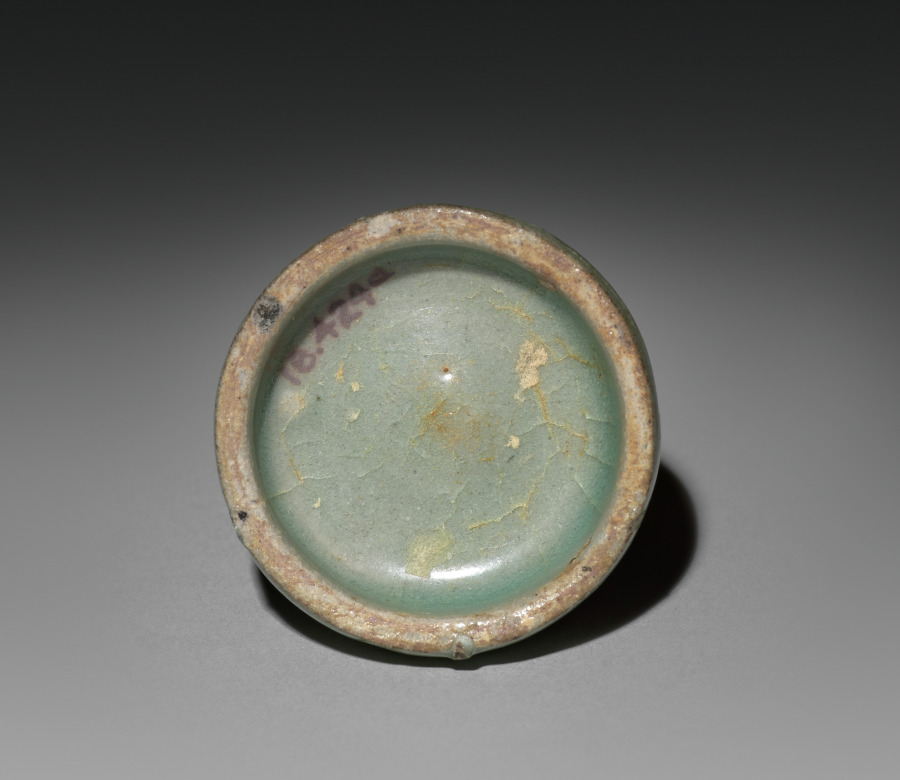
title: Box and Cover (lid)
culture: Korea, Goryeo dynasty (918–1392)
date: 918–1392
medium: celadon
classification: Ceramic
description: Celadons, spoons, seals, and bronze mirrors were the most common burial objects in tombs during the Goryeo period (918-1392). Once used to contain color powder, rouge and eyebrow gel for makeup, this small container was one of the standard goods that furnished elites' tombs. Goryeo-period women and men used the grain powder of rice or millet for whitening their skin, safflower extract for rouge, and plant ash or soot for eyebrow gel. Yet, natural-looking make-up seems to have been the most favorable one in Korea according to the travelogue by Xu Jing (1091-1153), the Chinese diplomat who visited Korea in 1123.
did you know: This ceramic container was used to store either incense or cosmetics.